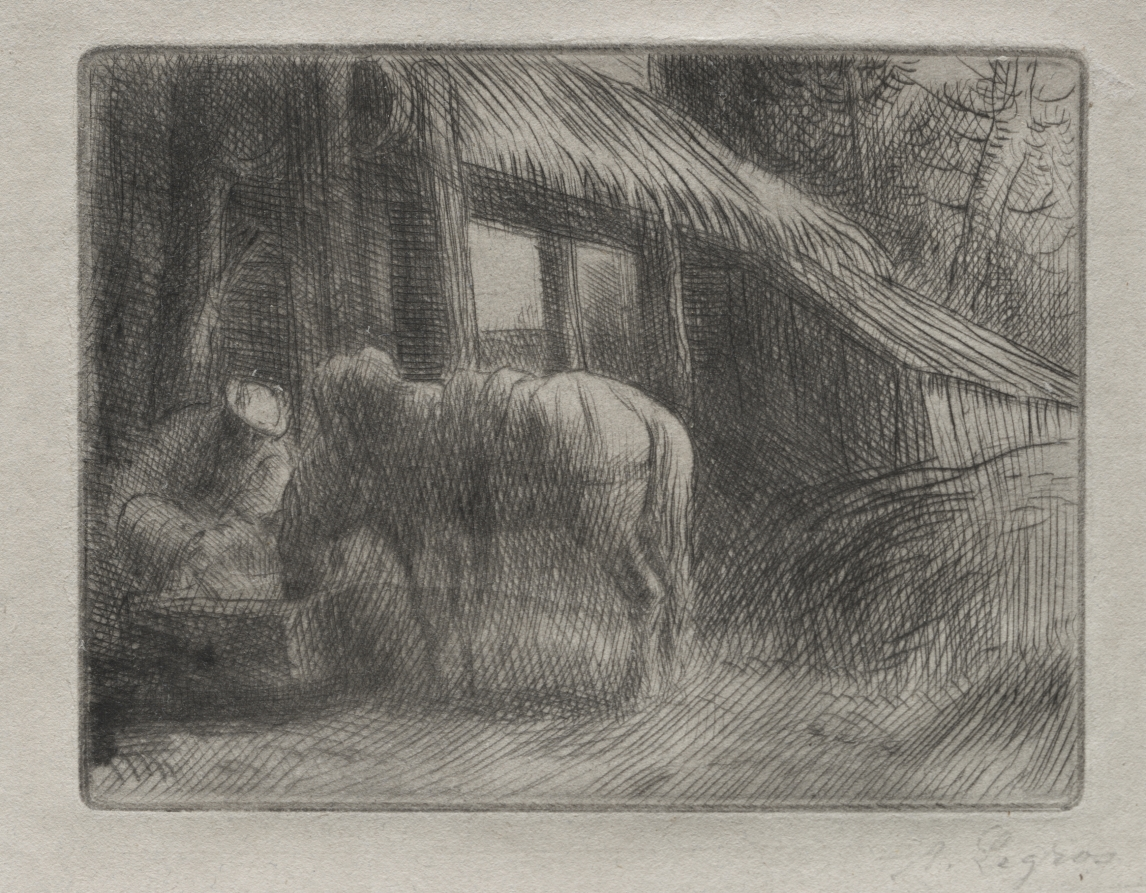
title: The Watering Place (2nd Plate)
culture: France, 19th-20th century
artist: Alphonse Legros (French, 1837–1911)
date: c. 1857–1911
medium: etching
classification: Print